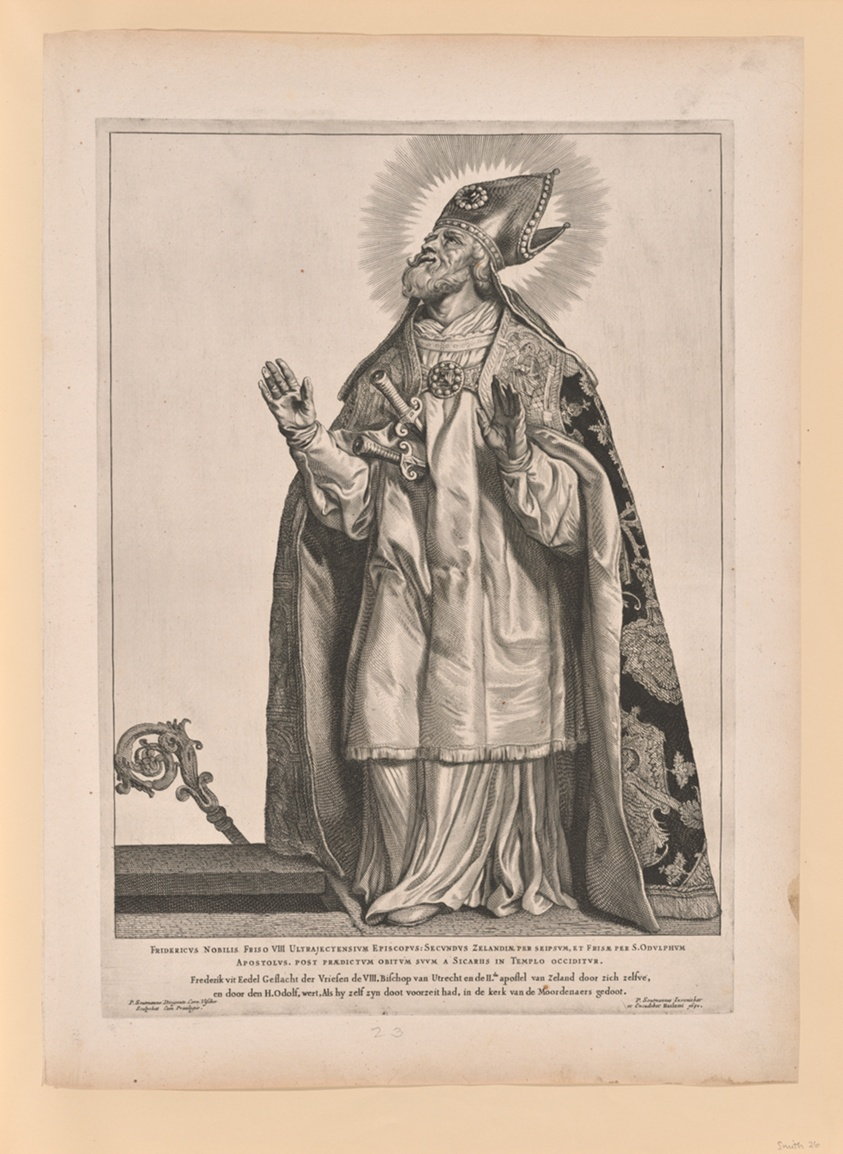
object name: Print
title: Saint Gregory of Utrecht, from Saints of the North and South Netherlands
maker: Cornelis Visscher (Dutch, c. 1629-1658); after Pieter Claesz. Soutman (Dutch, c. 1580–1657)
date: 1650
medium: Etching and engraving on paper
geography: Netherlands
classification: engraving; paper; print; prints and drawing